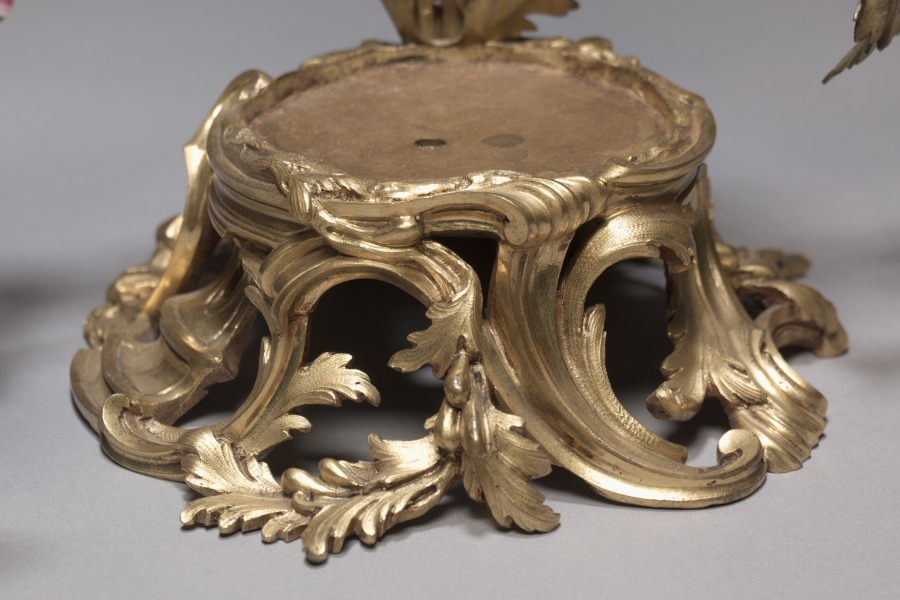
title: Candelabrum with Parrot (Candelabrum)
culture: France, style of Louis XV, 18th century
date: c. 1750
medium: gilt bronze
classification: Furniture and woodwork